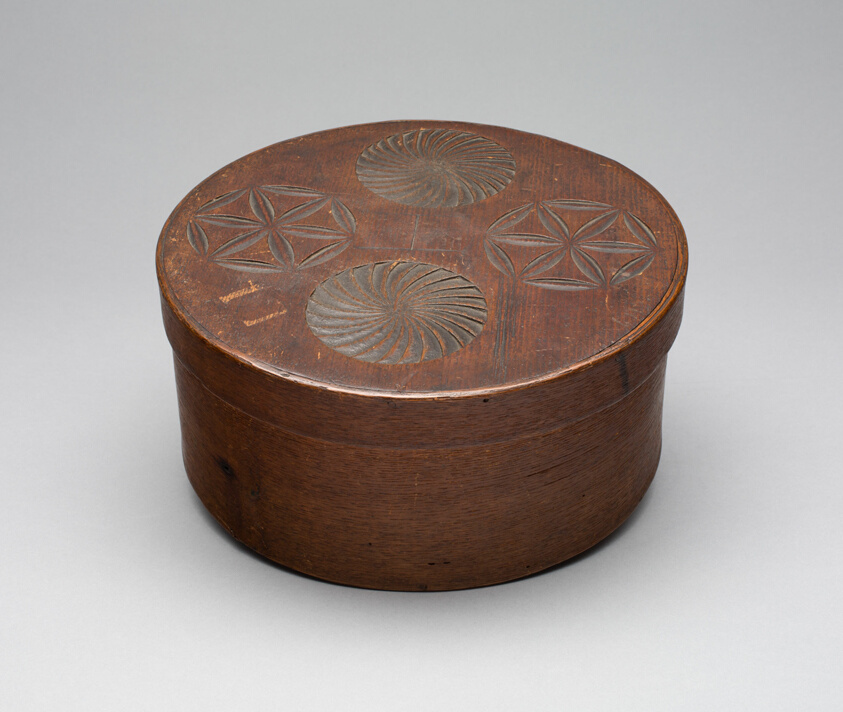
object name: Decorative Arts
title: Box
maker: Artist unknown (American, active 19th century)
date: 1830–70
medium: White pine and hickory or ash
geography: United States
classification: case furniture; box; furniture; american decorative arts; american arts; decorative arts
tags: furniture